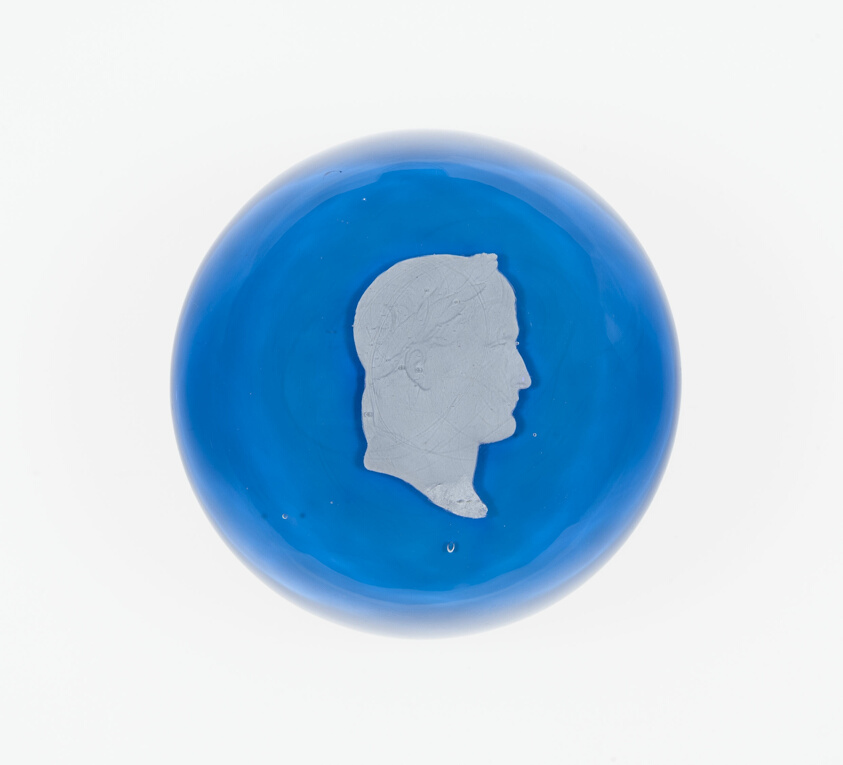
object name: Glass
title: Paperweight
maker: Clichy Glassworks (Cristalleries de Clichy); Clichy, France, 1837-1885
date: Mid 19th century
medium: Glass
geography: Clichy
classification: paperweight; glass